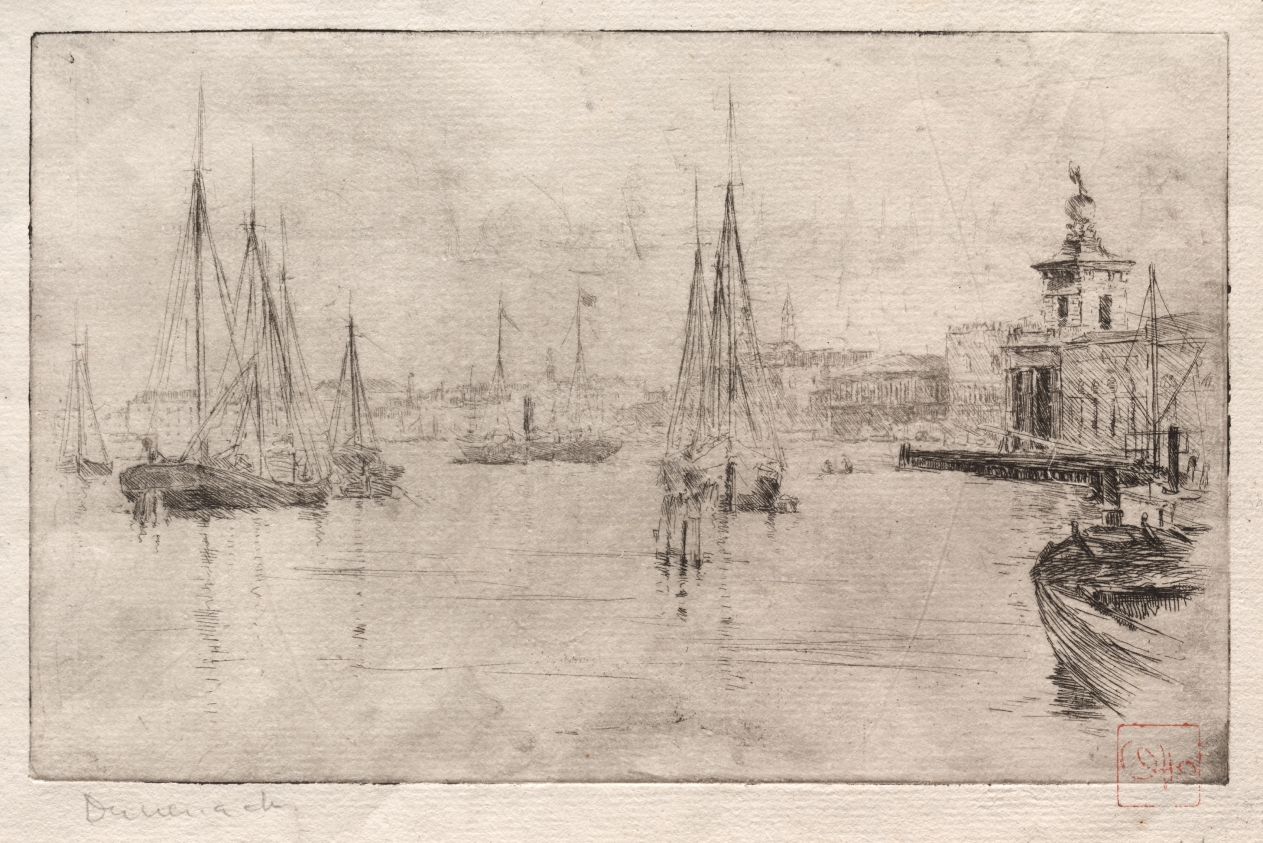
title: Shipping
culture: America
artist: Frank Duveneck (American, 1848–1919)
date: 1883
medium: etching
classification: Print